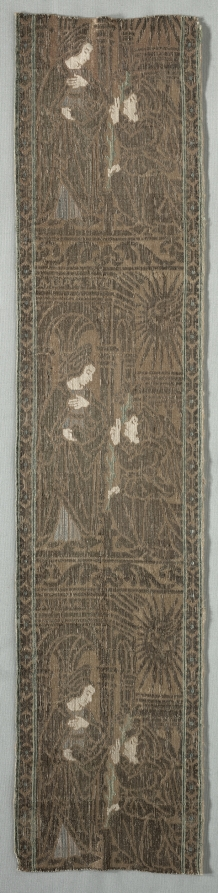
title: Orphrey Band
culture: Italy, Florence, second half of 15th century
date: 1450–99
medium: lampas weave, silk and gold thread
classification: Textile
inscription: "Ave Maria" written backwards above figures.